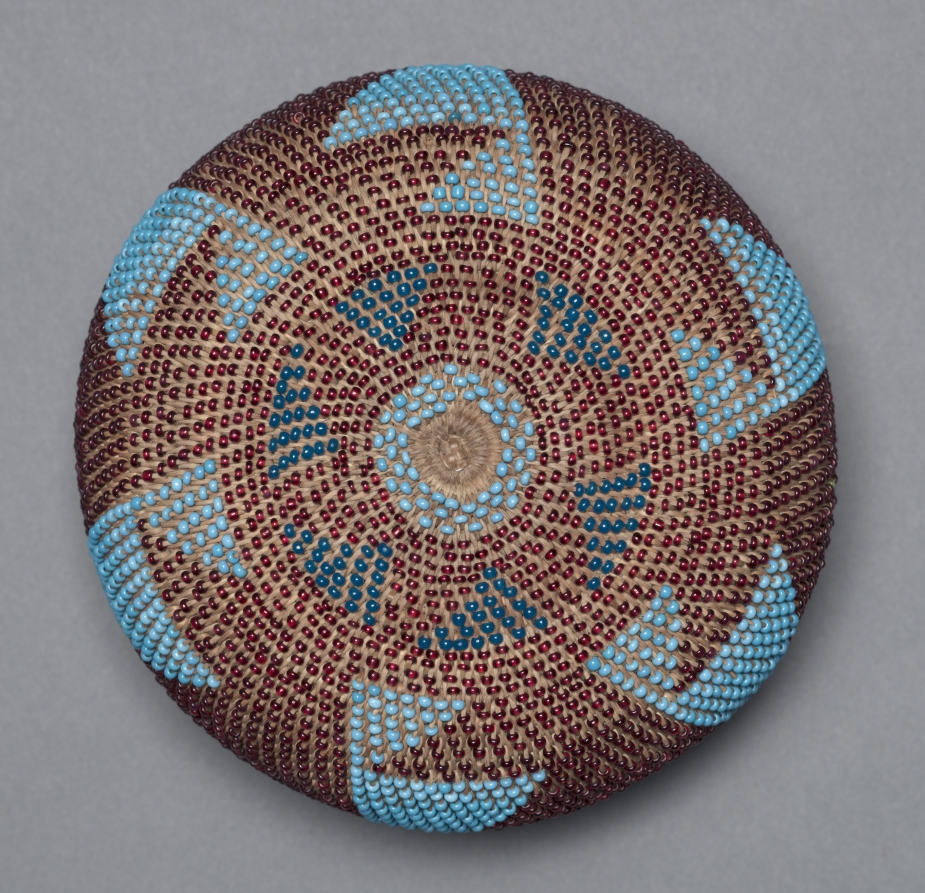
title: Gift Bowl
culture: California, Wappo, late 19th- early 20th century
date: c. 1895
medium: willow, sedge, with beads; coiled (1 rod)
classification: Basketry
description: To allow spirits to circulate freely in a basket, some California weavers provide a spirit door: an intentional design irregularity that can be as subtle as a tiny break in a stitch or as obvious as a feather or a bead of a different color. The single green bead in this superb gift basket may be such a portal.